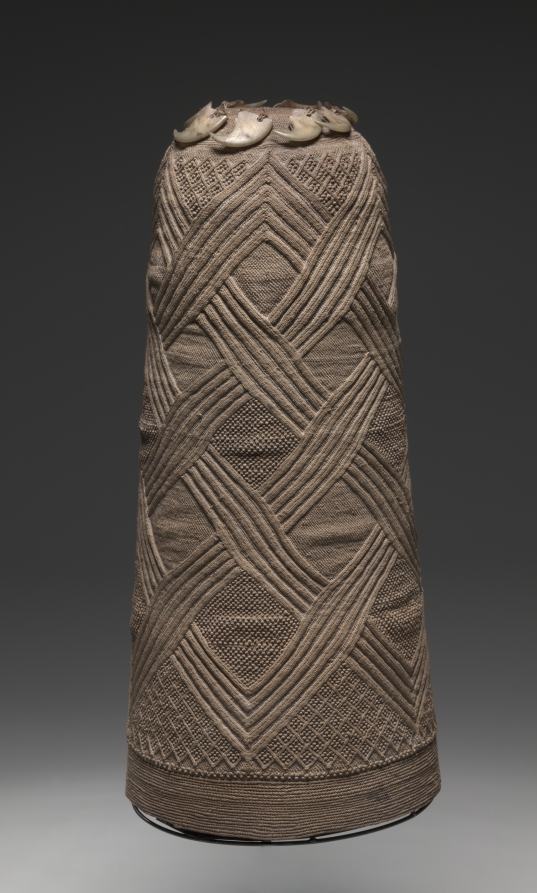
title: Prestige Cap (mpu ngola)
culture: Africa, Central Africa, Democratic Republic of Congo, Republic of Congo, or Cabinda (Angola), Kongo-style maker, possibly Yombe subgroup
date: late 1800s–early 1900s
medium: Raffia palm fiber (Raphia ruffia or R. vinifera) and leopard claws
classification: Garment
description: Zimpu (singular: mpu) are intricately knotted caps worn by men in parts of Central Africa. Ringed with leopard claws, this long cap (mpu ngola) once belonged to a high-status man; the fierce feline attachments alluded to his personal qualities, as both were seen as leaders in their domains. Its interlacing motifs appear across artforms made by the Kongo, Vili, and Yombe peoples. When new, caps draped over the head. However, raffia fibers stiffen over time. To support this now-delicate ngola, the CMA’s conservators mounted it upright. Known since at least 1607 in the former Loango Kingdom, as well as the adjacent Kongo Kingdom, such caps were once made by noblemen and worn into at least the 1980s.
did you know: The geometric motifs on this mpu cap—including diamonds and interlaces—are seen on Kongo, Vili, and Yombe works in other materials, including ivory and basketry.